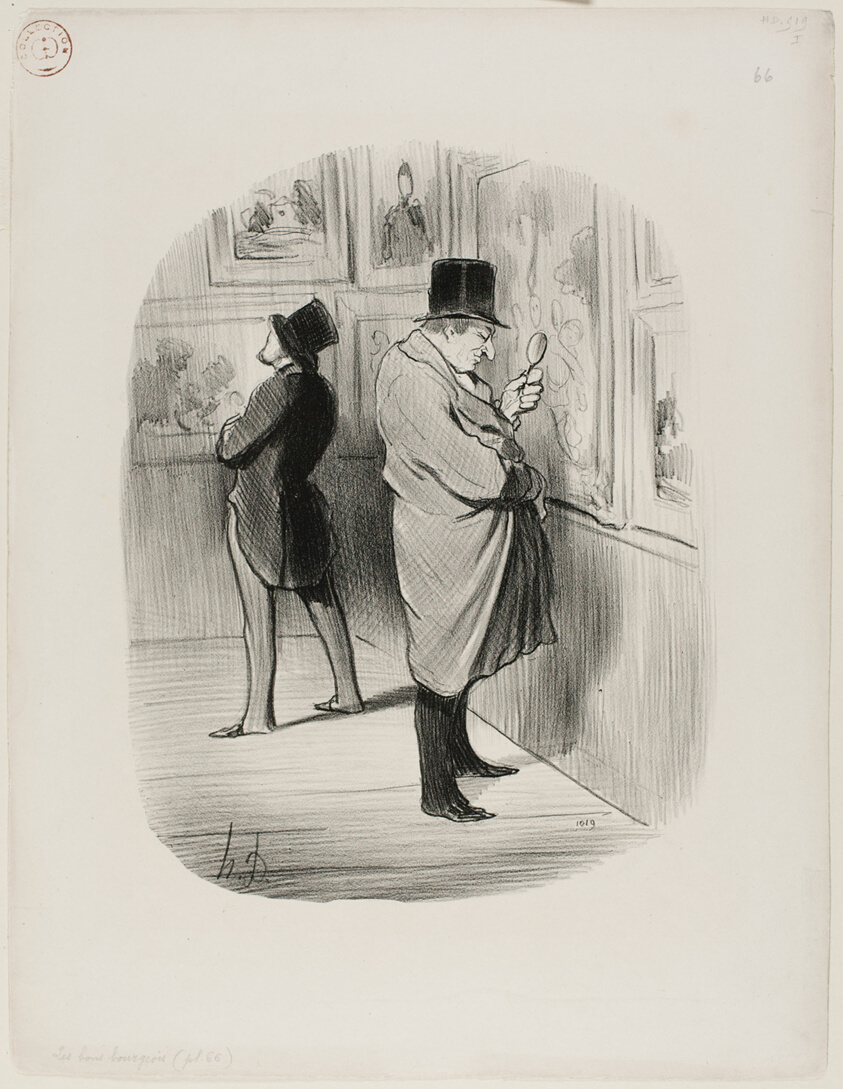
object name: Print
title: A True Art Lover, plate 66 from Les Bons Bourgeois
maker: Honoré Victorin Daumier; French, 1808-1879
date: 1847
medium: Lithograph in black on white wove paper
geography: France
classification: lithograph; print; prints and drawing